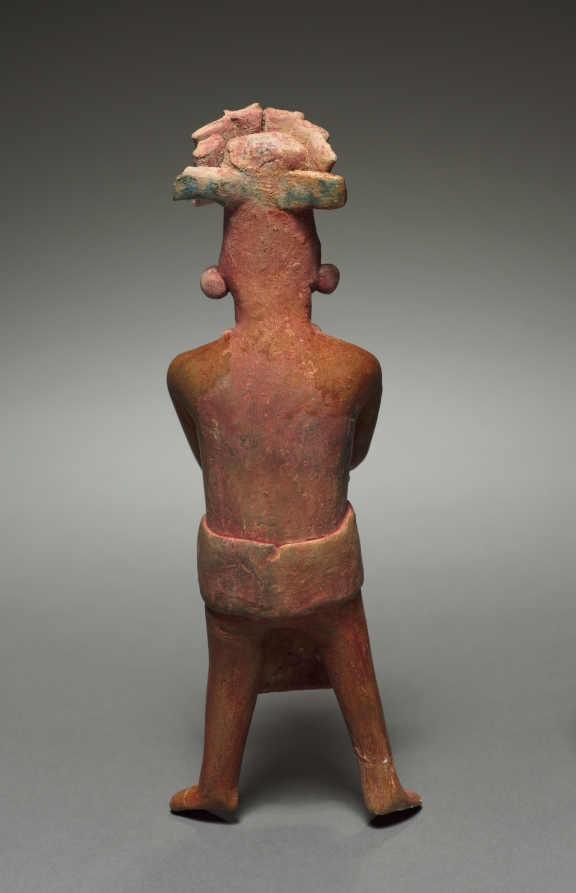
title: Figure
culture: Mexico, Jaina, Campeche, Maya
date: 317–987 CE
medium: terracotta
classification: Ceramic